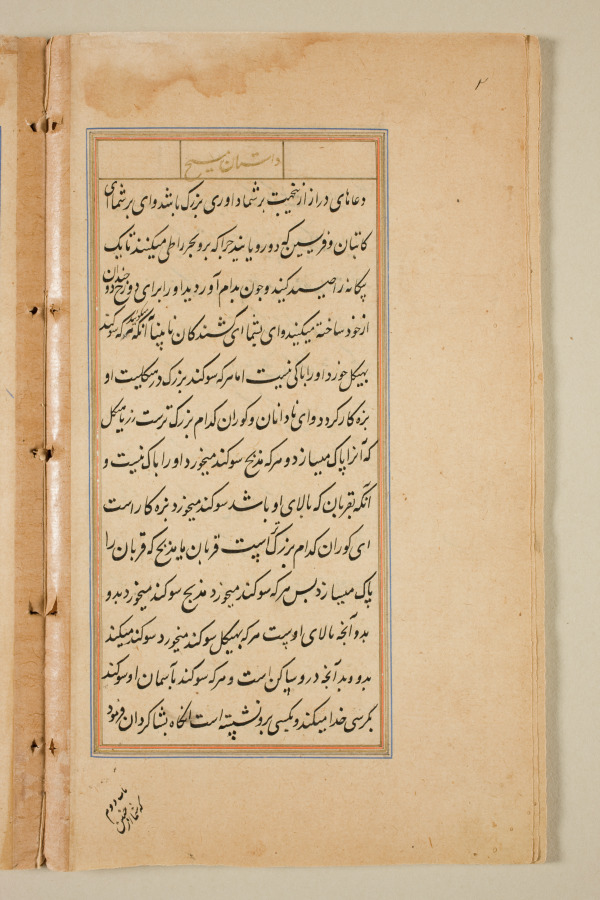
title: Text page from a Mirror of Holiness (Mir’at al-quds) of Father Jerome Xavier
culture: Mughal India, Allahabad, made for Prince Salim (1569–1627)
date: 1602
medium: Ink and gold on paper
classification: Manuscript